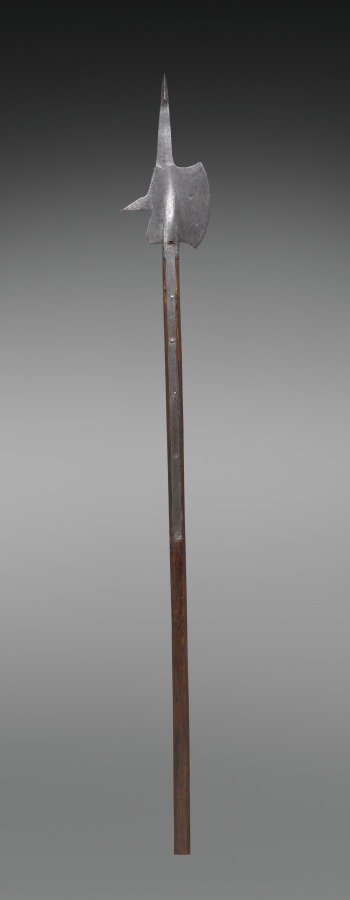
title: Halberd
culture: Switzerland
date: 1600s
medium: steel; new rectangular wood haft with planed corners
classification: Arms and Armor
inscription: IP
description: The halberd was a staff weapon favored by European infantries (foot soldiers) of the 1400s and 1500s for its versatility and deadly effect. The word halberd comes from the German words Halm (staff) and Barte (axe). The halberd is, in fact, an axe that served multiple functions: the axe blade was used for hacking, the spike for thrusting, and the beak for piercing plate armor or for pulling a knight from his saddle. The halberd was used by shock troops (those who lead an attack) and by Swiss and German mercenaries. After about 1550, the halberd gradually became less functional. Its large blade provided space for coats of arms and insignia. By the late 1500s, the parade halberd had become a ceremonial weapon for palace guards.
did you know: The earliest known mention of the halberd is believed to be by the Swiss poet Konrad von Würzburg (d. 1287) who wrote about them in his History of the Trojan War.